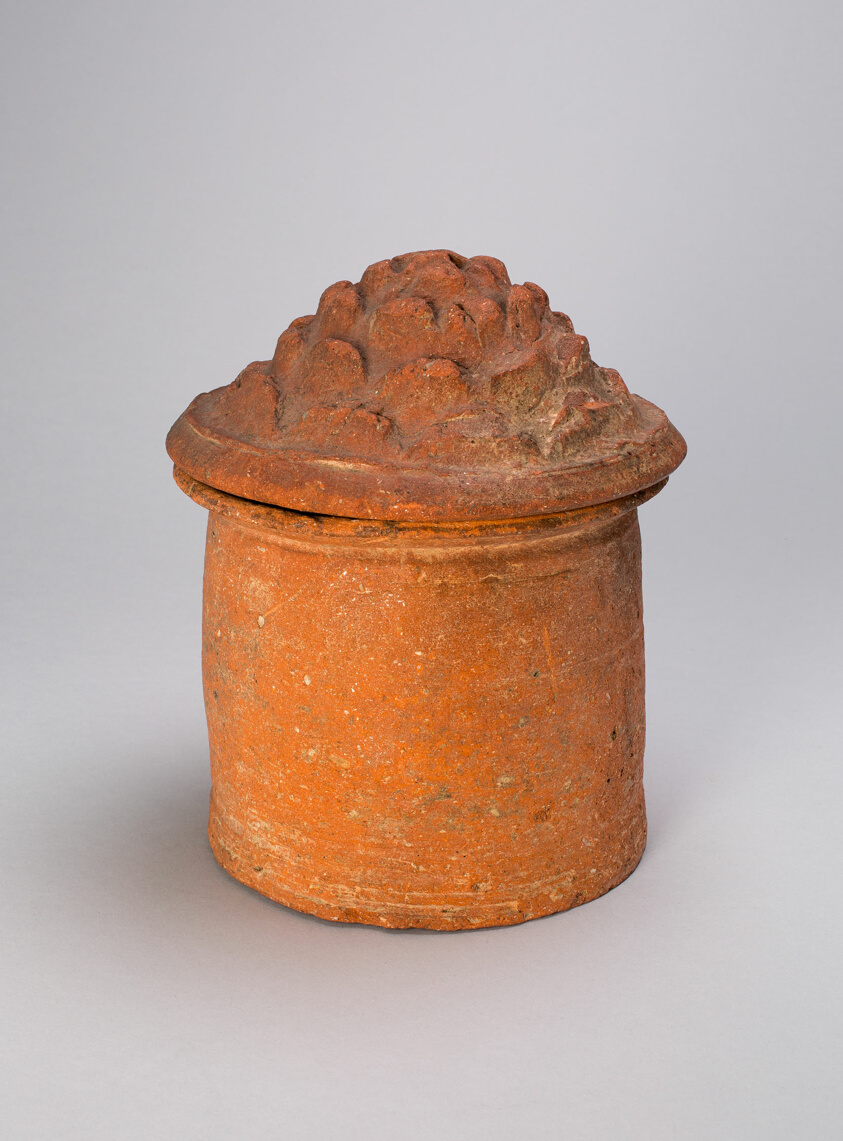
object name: Vessel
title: Cylindrical Jar with Mountain-Shaped Lid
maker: China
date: Western Han dynasty (206 B.C.–A.D. 9)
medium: Earthenware with molded and carved decoration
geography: China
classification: ceramics; asian art; vessel